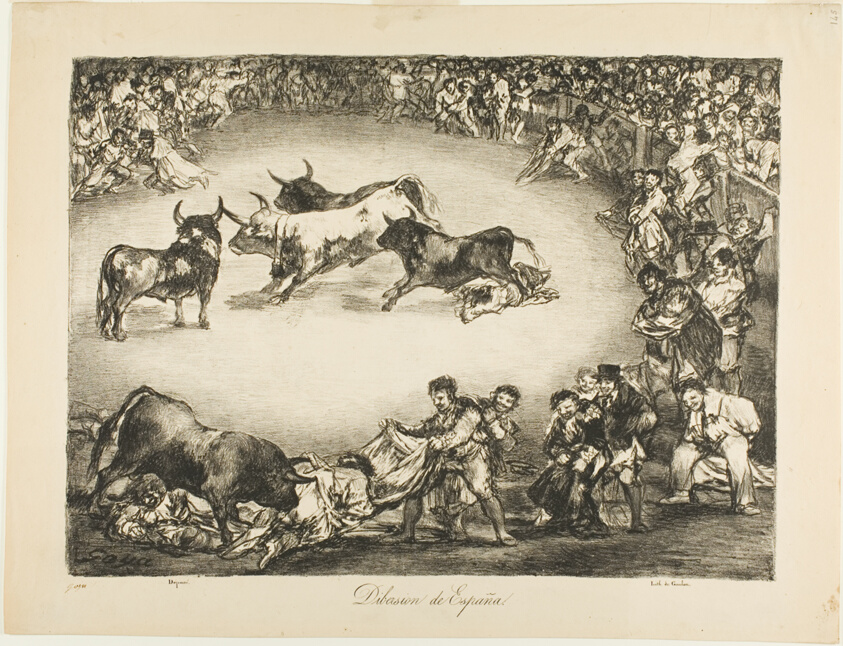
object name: Print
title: Spanish Entertainment, from The Bulls of Bordeaux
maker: Francisco José de Goya y Lucientes (Spanish, 1746-1828)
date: 1825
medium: Lithographic crayon and scraper on light tan wove paper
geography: Spain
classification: lithograph; print; prints and drawing